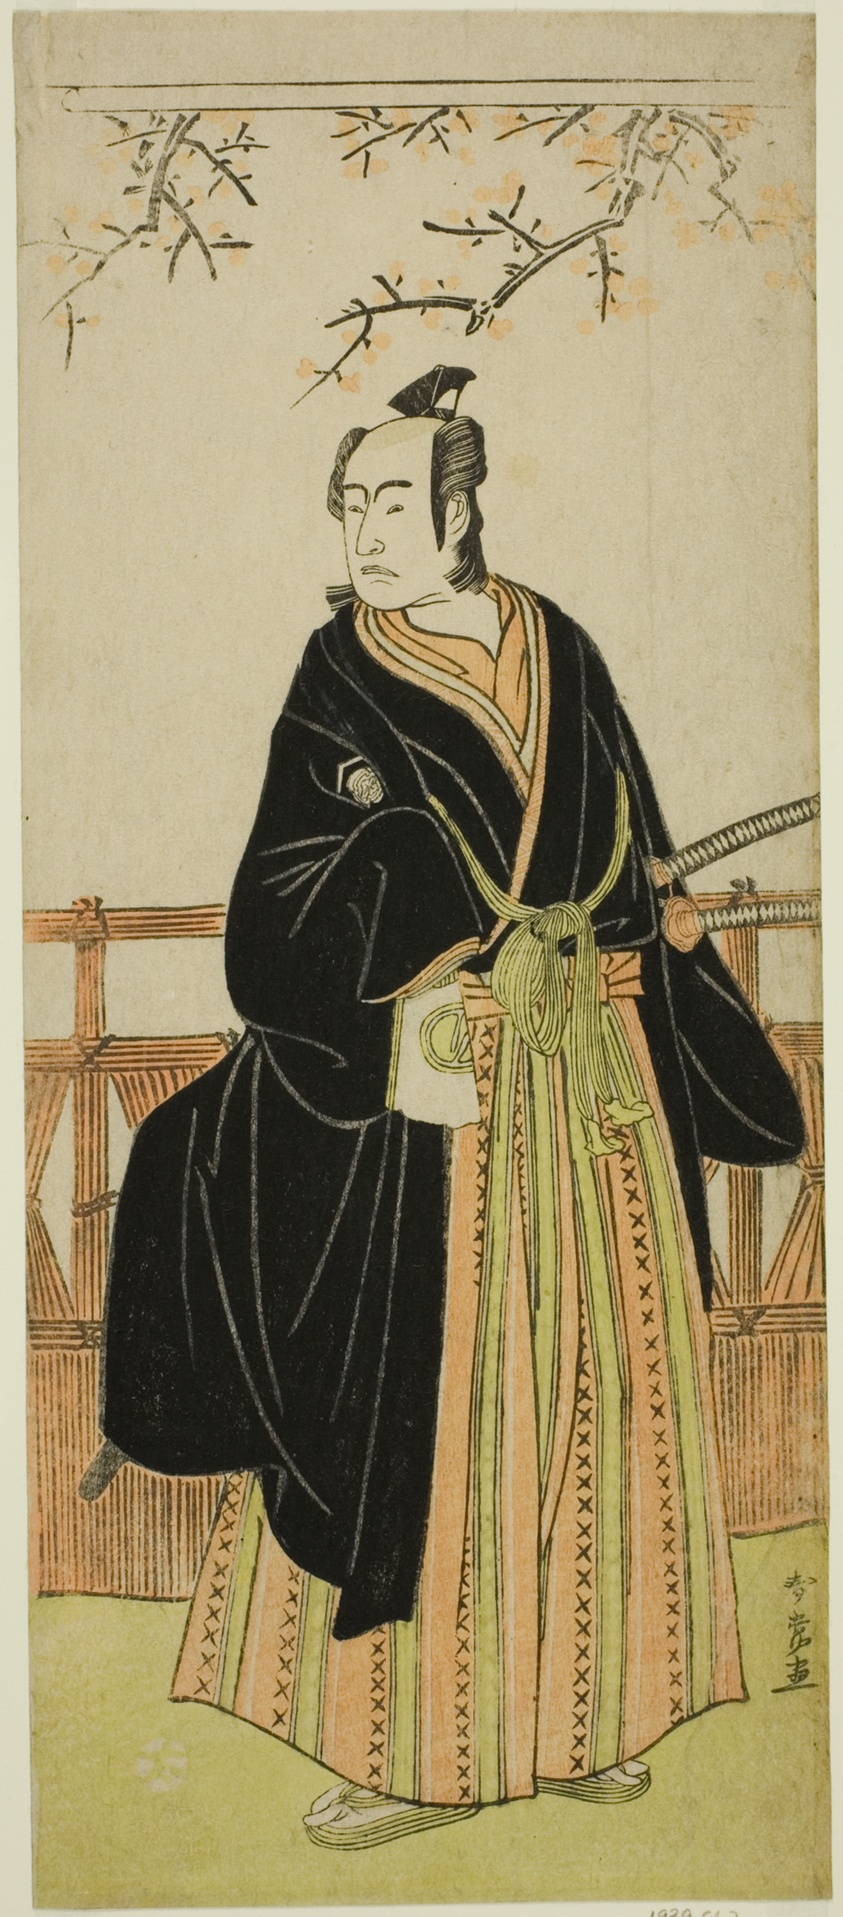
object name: Print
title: The Actor Sawamura Sojuro III as Soga no Juro Sukenari in the Play Edo no Hana Mimasu Soga, Performed at the Nakamura Theater in the First Month, 1783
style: Japanese (culture or style)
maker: Katsukawa Shunjo; Japanese, died 1787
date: c. 1783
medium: Color woodblock print; hosoban; from a multisheet composition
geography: Japan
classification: woodblock print; print; asian art